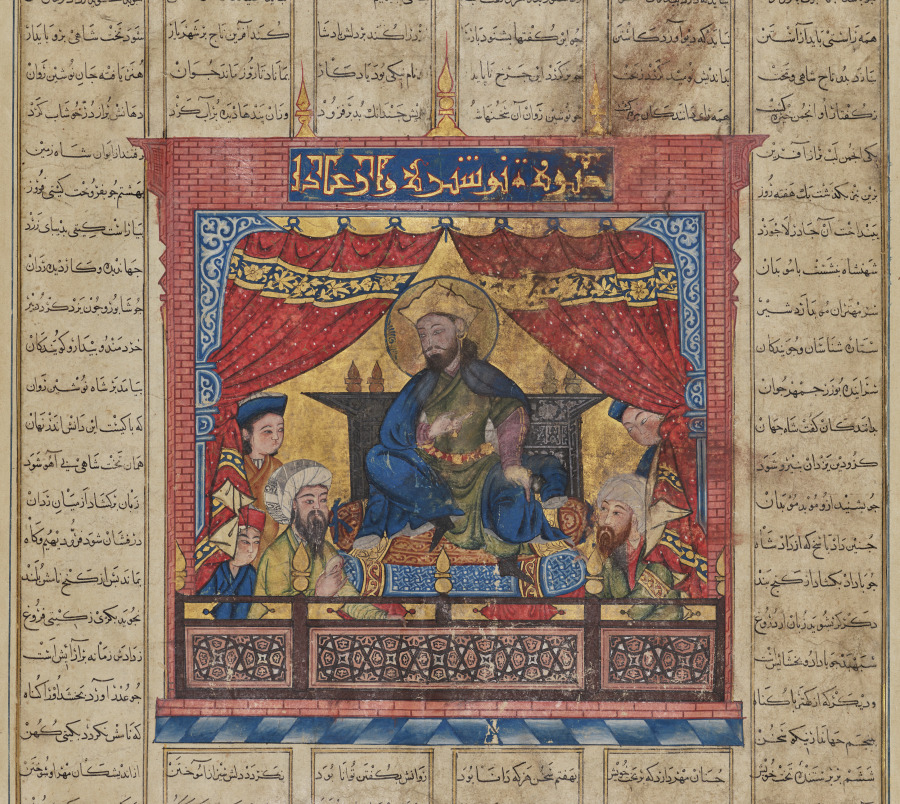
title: Portrait of Nushirwan the Just (verso) from a Shahnama (Book of Kings) of Firdausi (940–1019 or 1025)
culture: Iran, Tabriz, Ilkhanid period (1256-1353)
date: 1330–35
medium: opaque watercolor, ink, and gold on paper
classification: Manuscript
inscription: Script: Naskh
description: Mongol interest in the production of illustrated manuscripts eventually focused on Persian epic poetry. The Shahnama, a compilation of the epics and tales of Iran's legendary heroes, was a natural choice; the book included many subjects that suited Mongol taste, such as banquets, battles, hunting, and magical or fantastic events. Seated on the throne in the center of the painting is the Sasanian ruler of Iran, Khusraw I Anushirwan (531–579), descendant of Bahram Gur. Above the king's head an inscription reads, "Picture of Nushirwan the Just." The figure in the elaborate turban to the left of the king is probably the young Minister Buzurgmihr, famous for his wisdom and virtue. To celebrate the explanation of a troublesome dream by Buzurgmihr, Nushirwan held a series of seven banquets. The text around this painting describes the fifth banquet.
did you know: The symmetrical composition conveys the stability, balance, and restraint during the reign of King Nushirwan the Just.